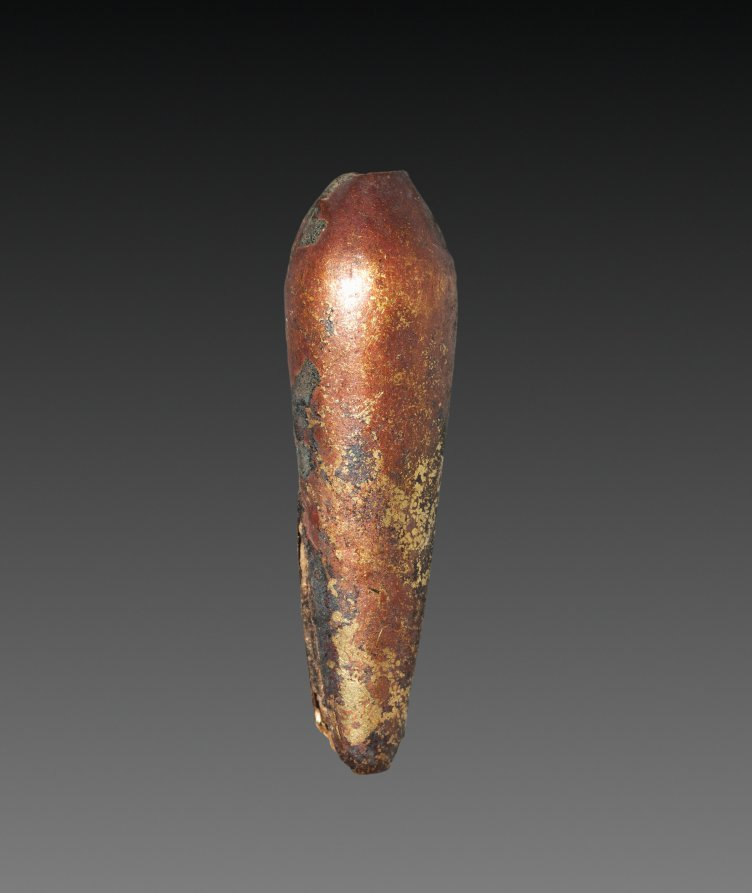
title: Teardrop-Shaped Bead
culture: Egypt, Middle Kingdom (2040–1648 BCE), Dynasty 12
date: 1991–1802 BCE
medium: gold over calcite gesso core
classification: Jewelry